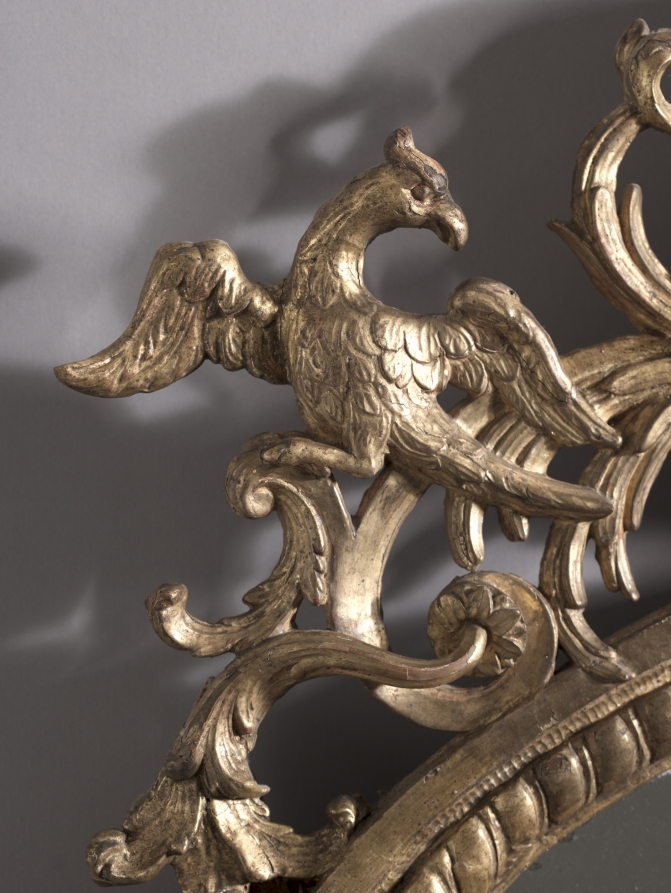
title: Wall Mirror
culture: France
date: c. 1720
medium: carved and gilded wood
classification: Furniture and woodwork